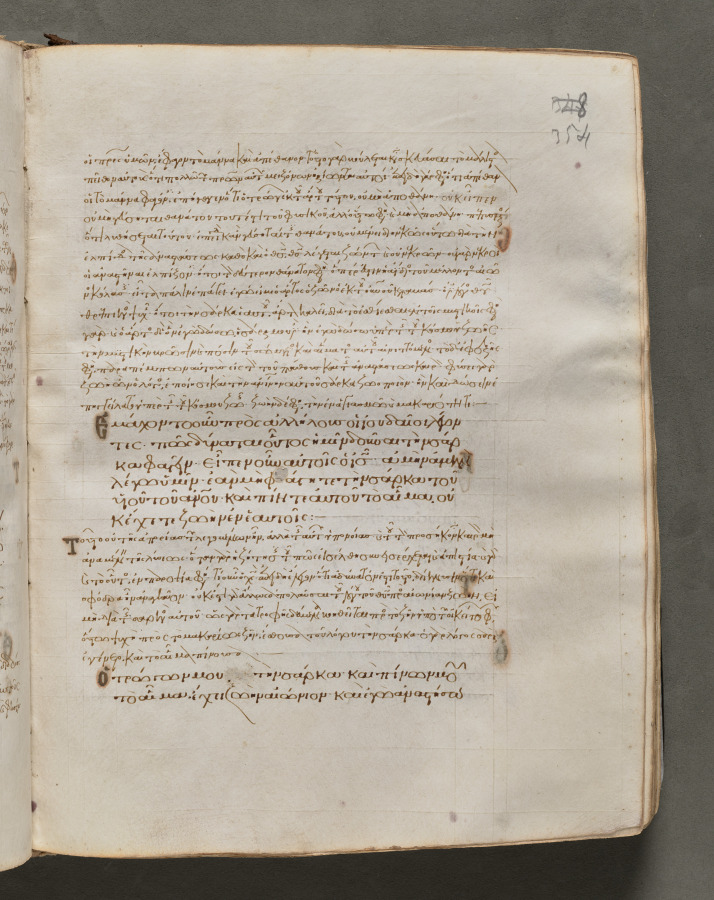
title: Text, folio 354 (recto), from a Gospel Book with Commentaries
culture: Byzantium, Constantinople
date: c. 1000–1100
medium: ink, tempera, and gold on vellum; leather binding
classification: Bound Volume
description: Each of the four gospels in this book opens on a page with brilliantly illuminated borders depicting the author of the text as well as birds—principally peacocks, symbols of the immortality of the soul—and fountains, representing the fountain of life and the salvation of the soul. This volume consists of 428 leaves with texts in Greek. Its level of sophistication suggests that it was probably written and decorated in a monastery in Constantinople.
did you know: Gospel books were carried in procession through Byzantine churches.